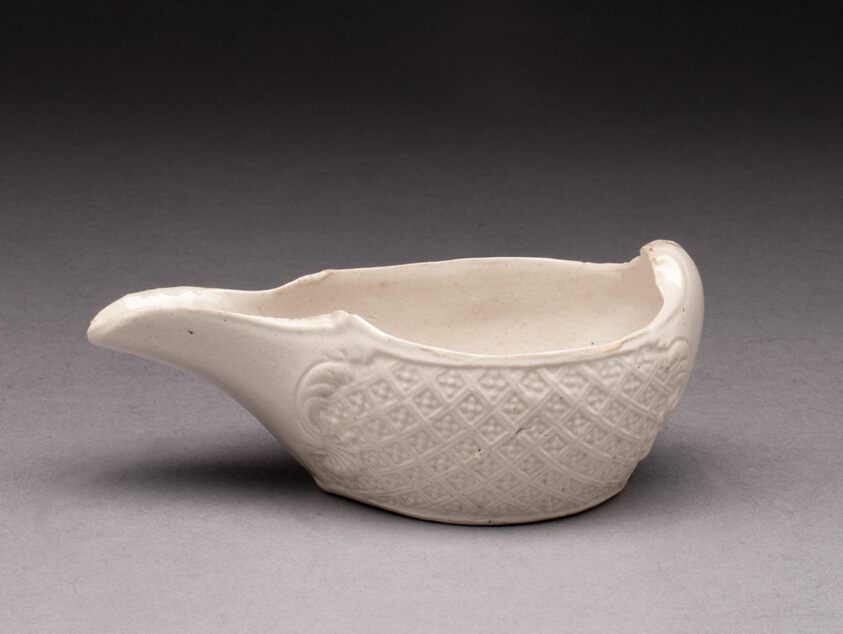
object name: Ceramics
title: Pap Boat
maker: England, Staffordshire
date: 1750/59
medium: Salt-glazed stoneware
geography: Staffordshire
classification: stoneware; ceramics; salt-glazed stoneware; european decorative arts